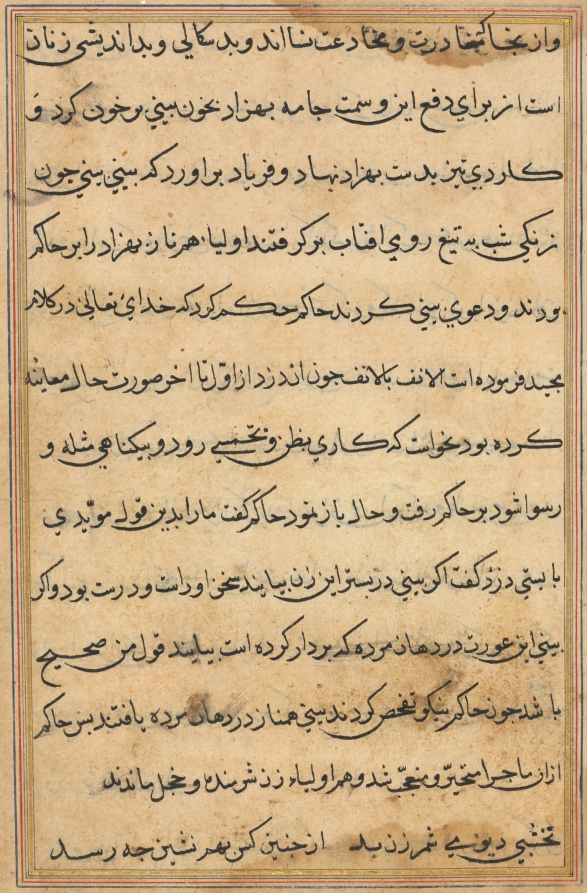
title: Page from Tales of a Parrot (Tuti-nama): text page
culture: Mughal India, court of Akbar (reigned 1556–1605)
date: c. 1560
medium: gum tempera, ink, and gold on paper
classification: Painting